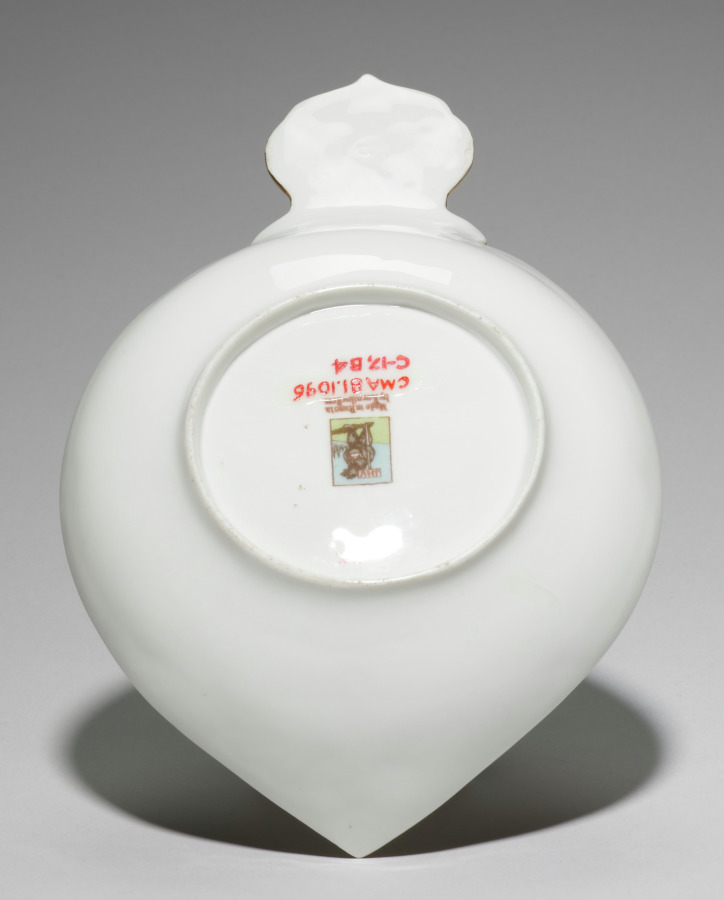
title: Porcelain "Kovsh"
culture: Russia, St. Petersburg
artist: Kornilov Brothers (Russian, established 1835)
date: 1893–1917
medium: porcelain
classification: Ceramic